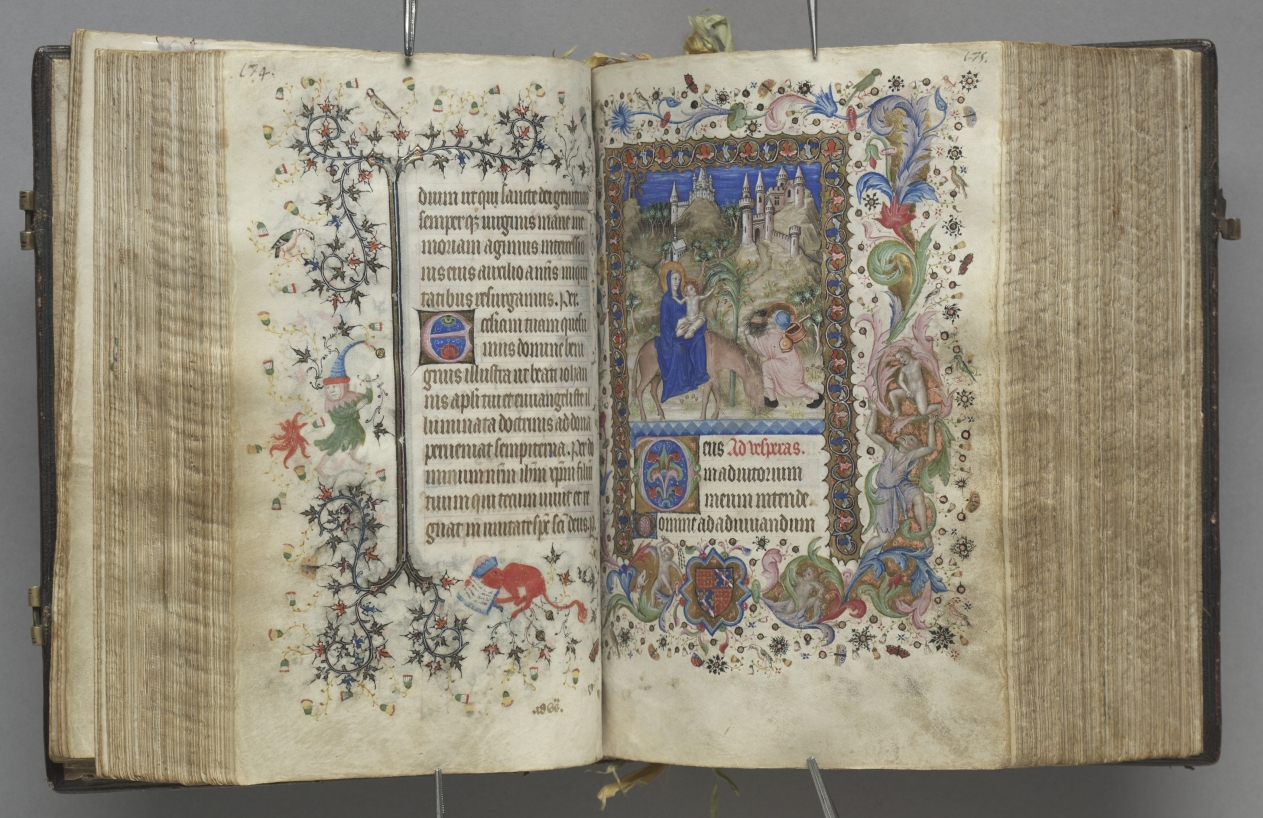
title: Hours of Charles the Noble, King of Navarre (1361-1425): fol. 88r, Flight into Egypt (Vespers)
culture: France, Paris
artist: Master of the Brussels Initials and Associates (French)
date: c. 1405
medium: ink, tempera, and gold on vellum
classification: Bound Volume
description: This precious volume was obviously highly prized by its owner, the French-born King of Navarre, who had his coat of arms painted on no less than twenty folios. Rather than directly commissioning this manuscript from a specific workshop, it seems that Charles the Noble acquired his book of hours -- perhaps ready-made for the luxury market -- while on a trip to Paris in 1404-05. A collaborative effort, six painting styles are evidenced within the pages of this codex, those of two Italians, two Frenchmen, and two Netherlanders. The painter who was responsible for the planning and decoration of the book, and who produced seventeen of the large miniatures, was a Bolognese artist known as the Master of the Brussels Initials. His principal assistant, responsible for most of the borders, was a Florentine who signed his name "Zecho" da Firenze on folio 208 verso.